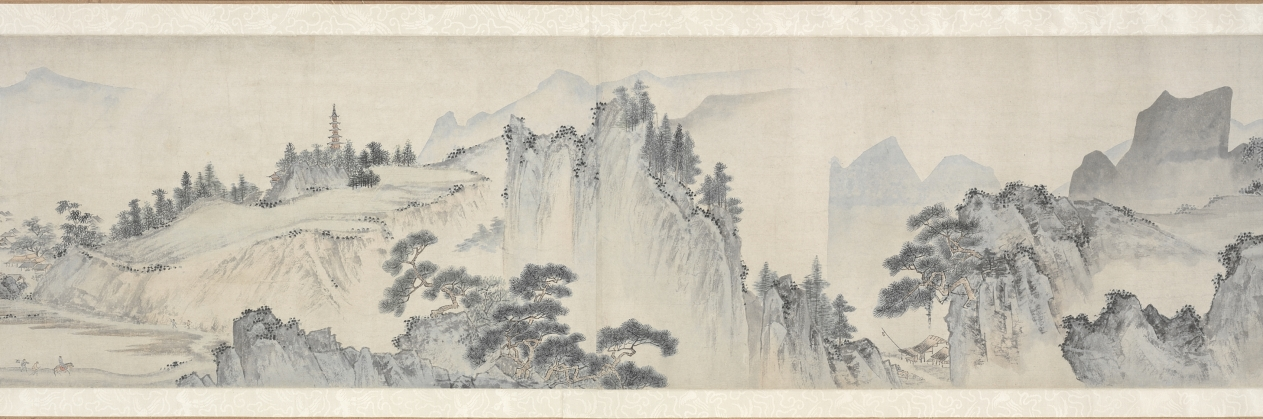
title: Ten Thousand Li of the Yangzi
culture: China, Ming dynasty (1368–1644)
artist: Dai Jin (Chinese, 1388–1462)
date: c. 1400s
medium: Handscroll; ink and color on paper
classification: Painting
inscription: Two colophons at end. Artist's seals: Dai Jin 戴進 and Wenjin 文進.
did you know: Dai Jin is traditionally considered the founder of the Zhe School, a style of landscape painting.